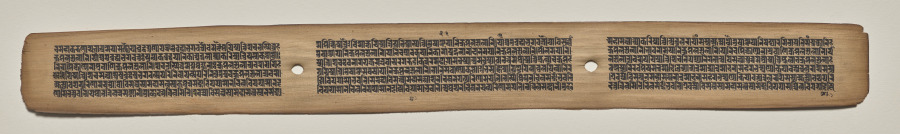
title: Text, folio 51 (recto), from a Manuscript of the Perfection of Wisdom in Eight Thousand Lines (Ashtasahasrika Prajnaparamita-sutra)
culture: Eastern India, Bihar, Vikramashila Monastery. Painting: Nepal, Kathmandu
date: Sunday, September 14, 1119 (year 239 of the Newar Samvat in the month of Ashvina)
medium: gum tempera and ink on palm leaves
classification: Painting